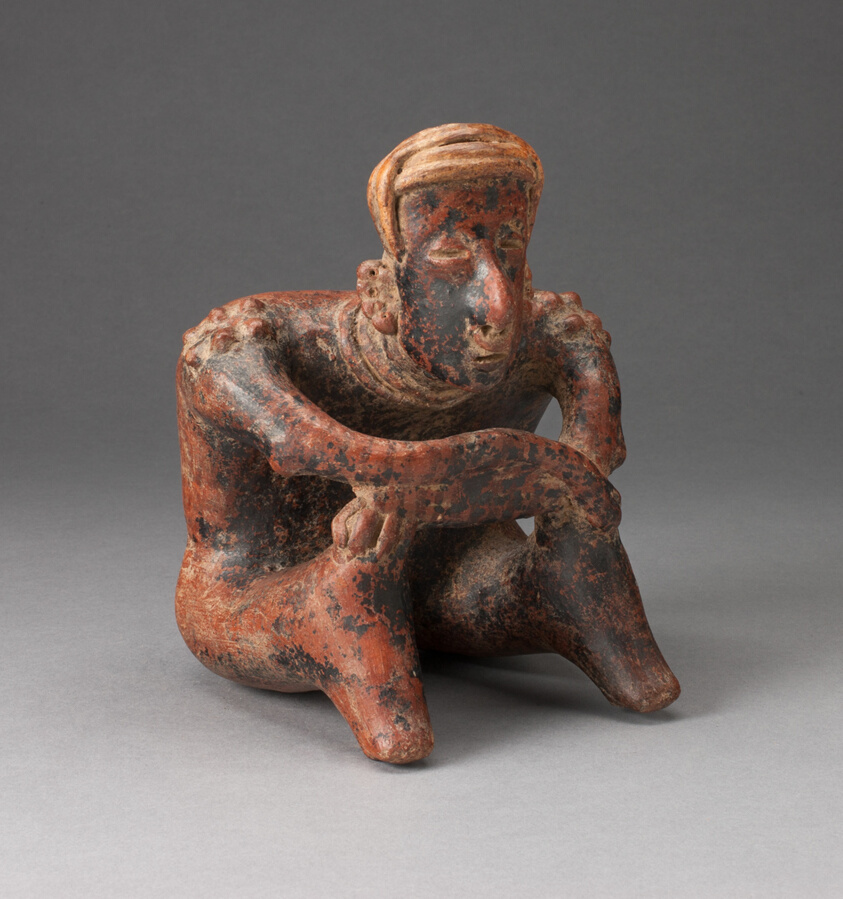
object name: Sculpture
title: Seated Male Figure Leaning Forward with Arms Crossed over Knees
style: nayarit, mesoamerican, Pre-Columbian, americas, Arts of the Americas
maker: Nayarit (Nayarit, Mexico)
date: c. 200 CE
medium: Ceramic and pigment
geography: Nayarit state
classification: earthenware; art of the americas; ceramics; sculpture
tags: people